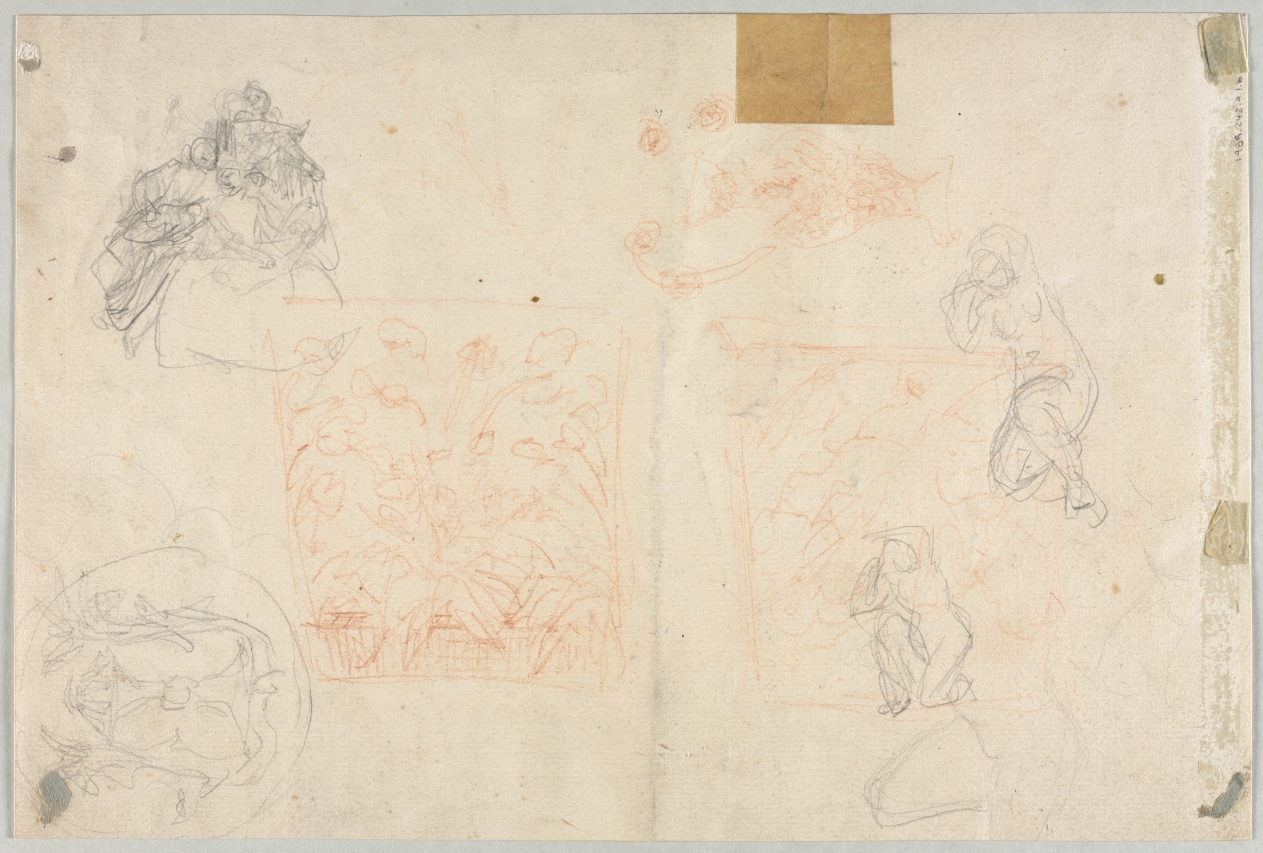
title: Various Sketches of Figures and Plants (verso)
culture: France, 19th century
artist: Anonymous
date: 19th century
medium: red chalk and graphite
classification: Drawing